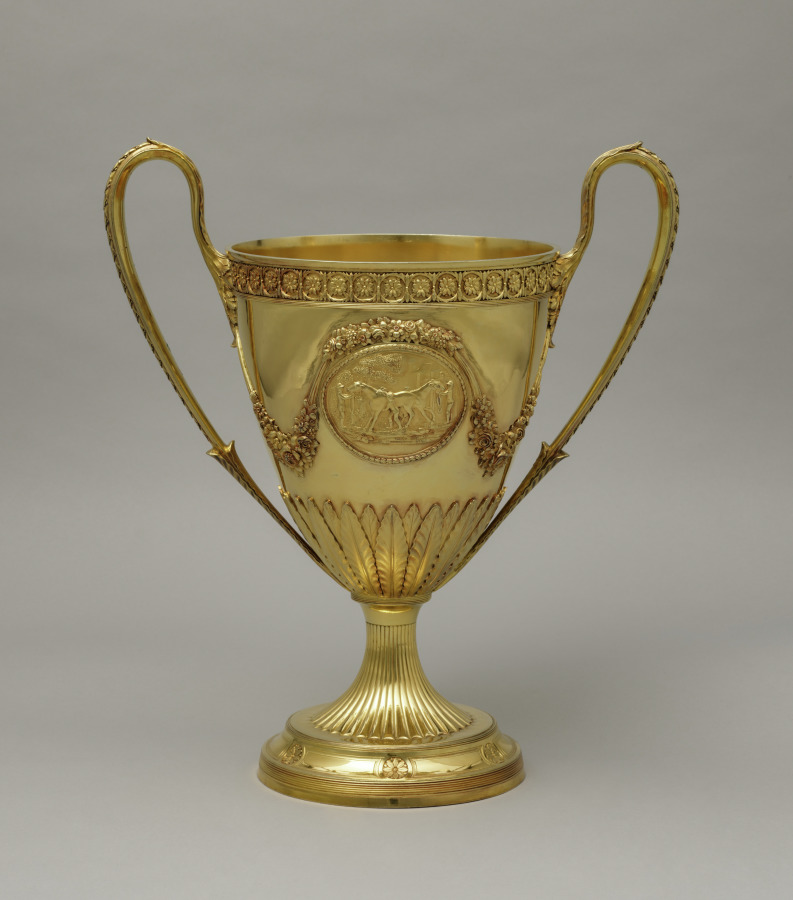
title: Trophy Cup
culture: England, 18th century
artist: Peter Bateman (British, 1740–1825)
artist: Anne Bateman (British, 1748–1813)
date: 1792–93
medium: silver gilt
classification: Silver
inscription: Engraved arms: Grosvenor impaling Egerton and Grey (arms of Robert Grosvenor (1767–1845), the first Marquess of Westminster, and Lady Eleanor Egerton (1770–1846))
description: Silver fulfilled a prominent role in projecting wealth, status, power, and ritual in British life during the 1600s and 1700s. Elaborate forms such as this trophy, with its swags of flowers, neoclassical rosettes, and acanthus spears, not only represented wealth in its sheer silver weight but also provided royal and aristocratic owners a surface for displaying engraved coats of arms. Engraved on one side of this trophy cup can be found the arms of Robert Grosvenor (1767–1845), the first Marquess of Westminster, and Lady Eleanor Egerton (1770–1846), whom he married in 1794, a year after the trophy’s completion. The other side depicts preparations for a horserace, the most culturally significant leisure activity enjoyed by aristocratic families in the 1700s. Grosvenor owned a number of famous horses and was likely awarded this trophy following a successful race.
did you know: This trophy cup has a lid. See cover record.